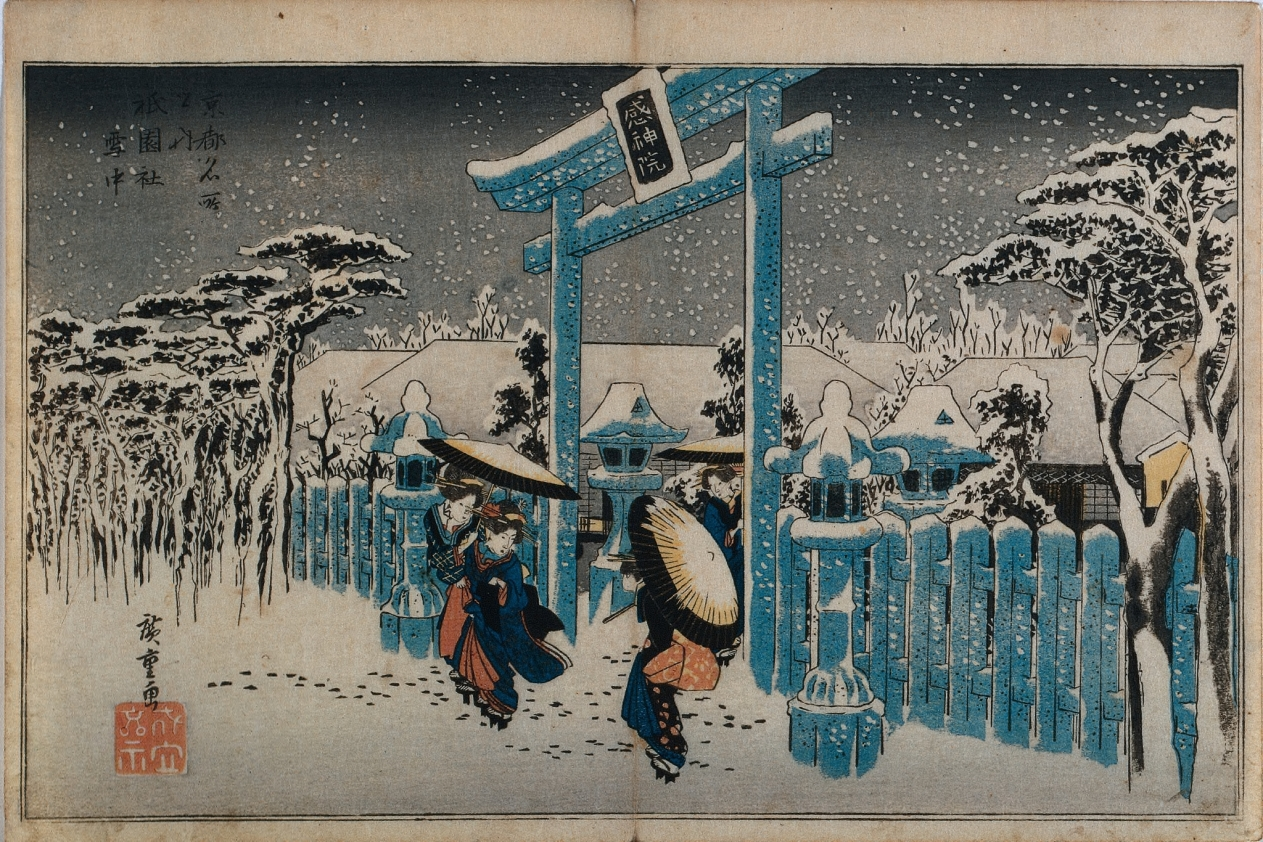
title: Snow at the Gion Shrine, from the series Famous Places in Kyoto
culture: Japan, Edo period (1615–1868)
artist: Utagawa Hiroshige (Japanese, 1797–1858)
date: mid-1830s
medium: color woodblock print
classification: Print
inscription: Signature: Hiroshige ga. Artist Seal: Ichiryusai.